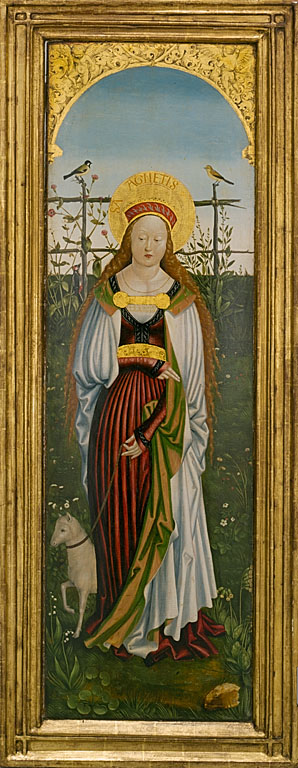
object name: Painting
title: Triptych of the Virgin and Child with Saints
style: 16th Century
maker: South German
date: c. 1510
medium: Oil and tempera on panel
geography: Germany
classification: triptych; painting; oil on panel; paint; tempera; european painting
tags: Century of Progress, woman with children, woman, women, Saint Margaret, Christian subjects, Christianity, garden, saints, Virgin and child/Madonna and child, Virgin Mary, world's fairs, Chicago World's Fairs